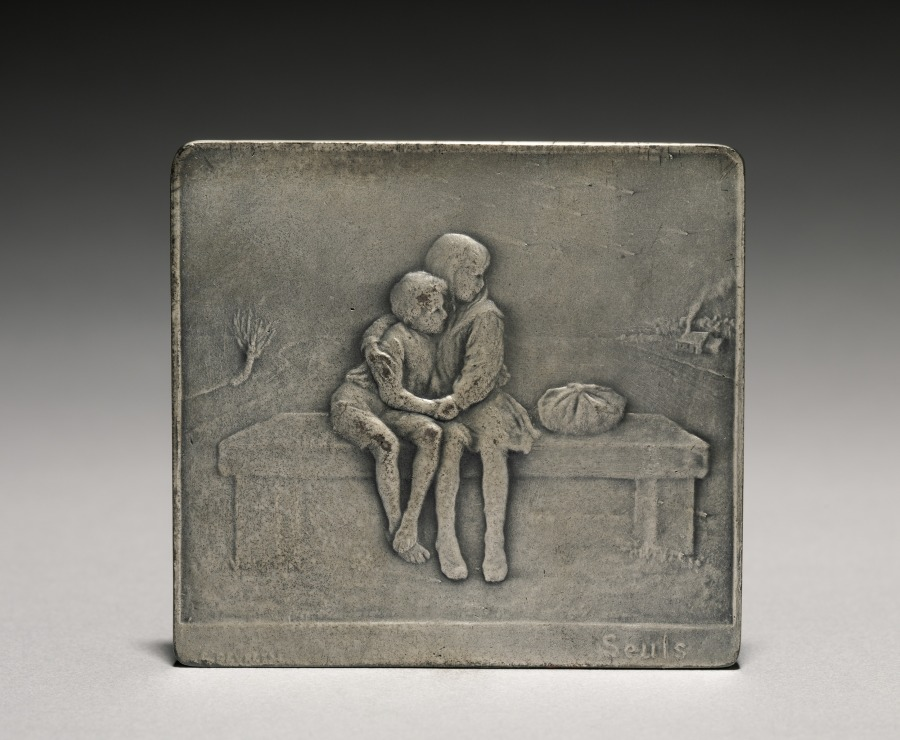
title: Plaquette (reverse)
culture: Belgium, 20th century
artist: Godefroid Devreese (Belgian, 1861–1941)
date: 1900s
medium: bronze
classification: Metalwork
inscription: inscribed lower left: "G. Devreese"; lower right: "SEUTS."